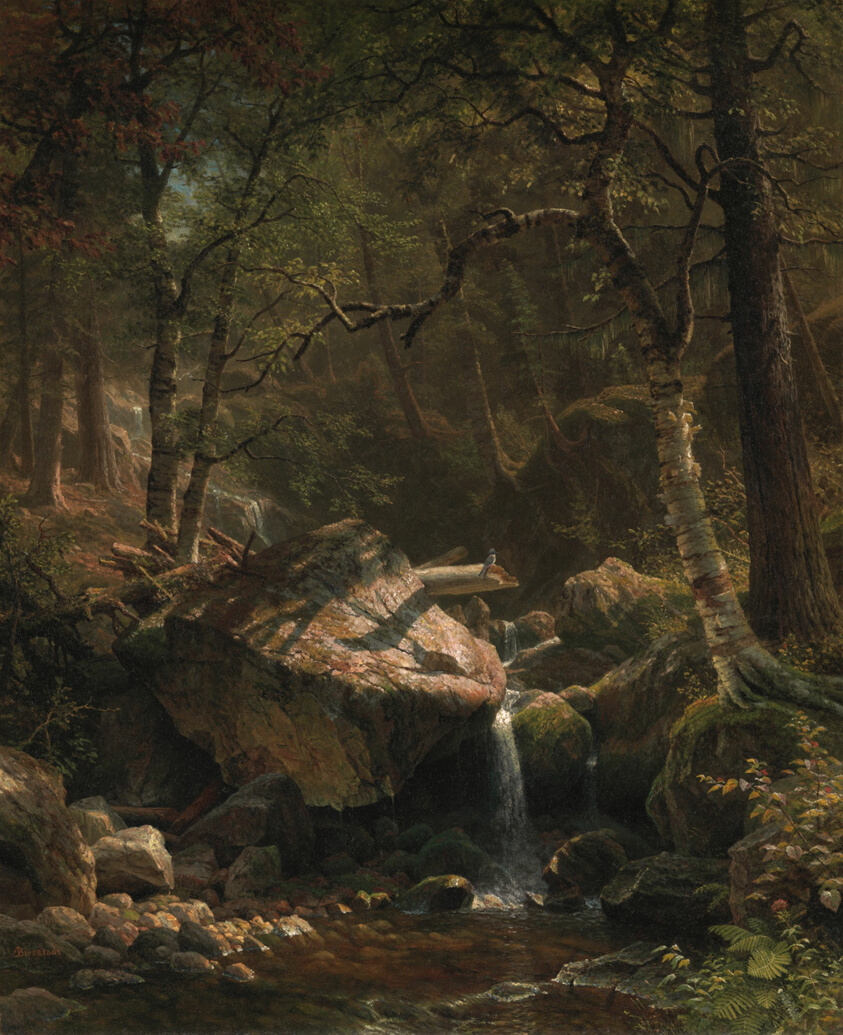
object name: Painting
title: Mountain Brook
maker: Albert Bierstadt (American, born Germany, 1830–1902)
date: 1863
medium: Oil on canvas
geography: United States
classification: painting; american arts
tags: landscapes, animals